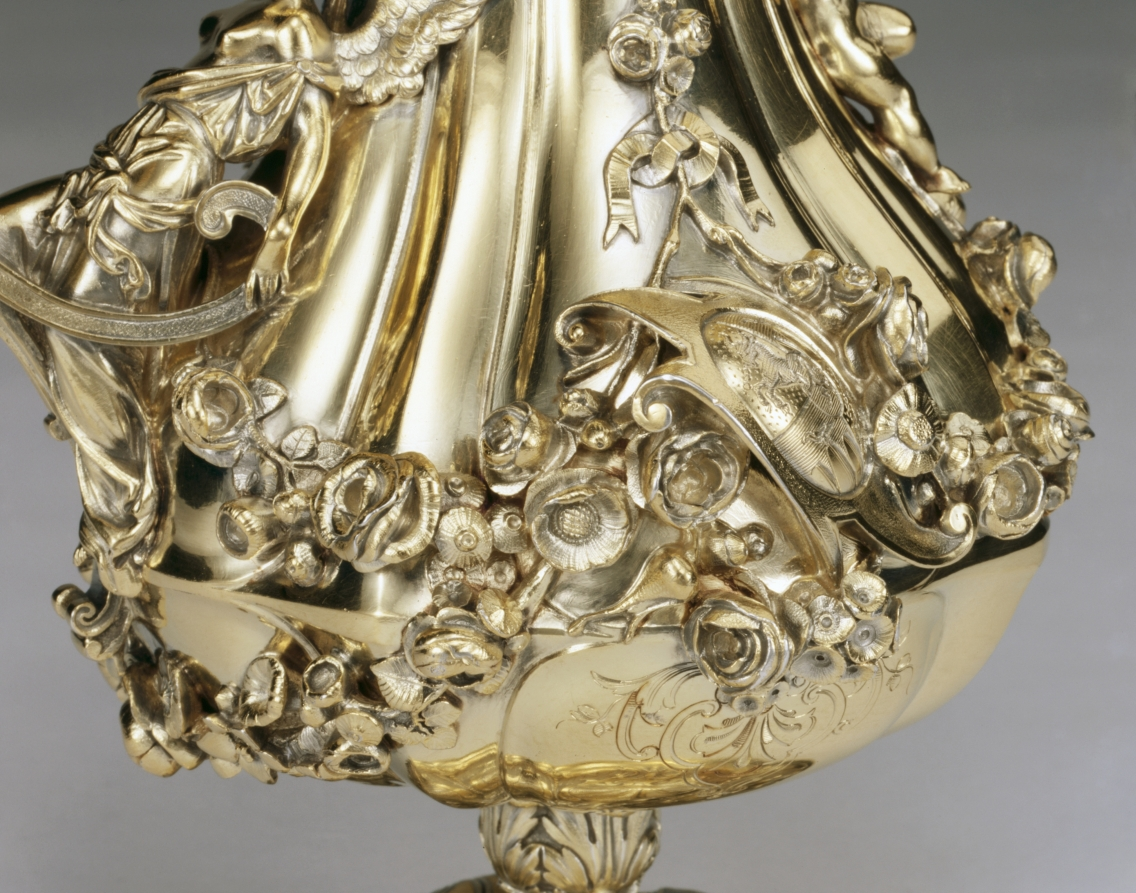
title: Covered Jug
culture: France, 19th century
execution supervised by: Jean-Valentin Morel (French, 1794–1860)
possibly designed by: Jules Dieterle (French, 1811–1889)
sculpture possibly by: Jules Klagmann (French, 1810–1867)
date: c. 1845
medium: gilded silver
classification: Silver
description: The elegance and richness of this ewer demonstrate the high level of technical mastery achieved by its maker. Morel studied under his father, a Parisian lapidary (someone who cuts, polishes, and engraves hard stones), and with Adrien Vachette, a maker of gold boxes. In 1842 he went into partnership with Charles-Edmond Duponchel, which lasted until the late 1840s, at which time he established himself in London, remaining there until 1852, when he returned to Paris. Morel frequentlyfollowed the designs of others, and it has been suggested that in the case of this pitcher his well-known contemporary, Jules Dieterle (1811-1889), may have conceived the overall form. The female figure seems to have been based on a design by the sculptor Jules Klagmann (1810-1867).